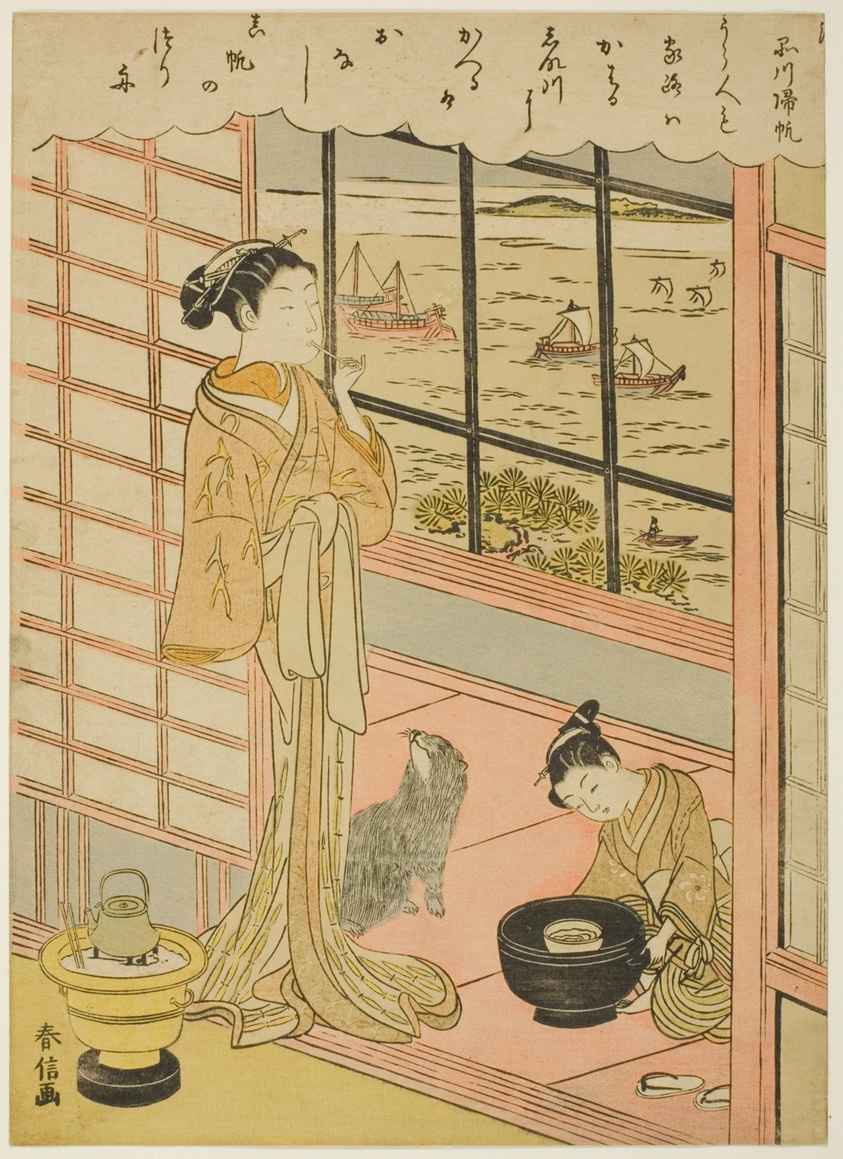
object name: Print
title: Returning Sails at Shinagawa (Shinagawa no kihan), from the series "Eight Fashionable Views of Edo (Furyu Edo hakkei)"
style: Japanese (culture or style)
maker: Suzuki Harunobu 鈴木 春信; Japanese, 1725 (?)-1770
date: c. 1768/69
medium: Color woodblock print; chuban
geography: Japan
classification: woodblock print; print; asian art